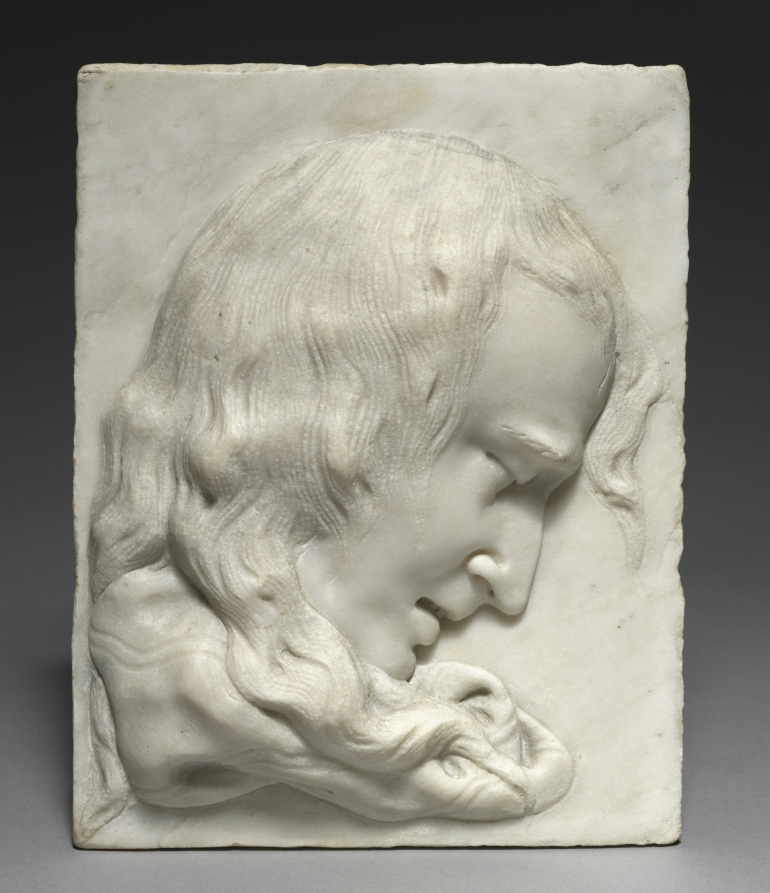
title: A Young Man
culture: Italy, early 18th Century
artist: Orazio Marinali (Italian, 1643–1720)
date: c. 1700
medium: marble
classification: Sculpture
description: During the late 1600s, Marinali produced several groups of profiles in low relief to decorate palaces in Venice. Traces of mortar appear on the back of this work, suggesting that it was once installed in masonry. Originally, the profiles would have been framed, probably with wood, and installed as part of a secular architectural decoration in a series, perhaps in a garden or on an entrance portal. These profile heads typically portrayed either virtuous male figures or anonymous studies of facial types. Starting in the Renaissance, many wealthy Italians built collections that combined antiquities with contemporary paintings and sculpture. Marinali's work played on this interest by juxtaposing a type of profile found on ancient and Renaissance coins and medals with a contemporary interest in physiognomy and the representation of affect and temperament.